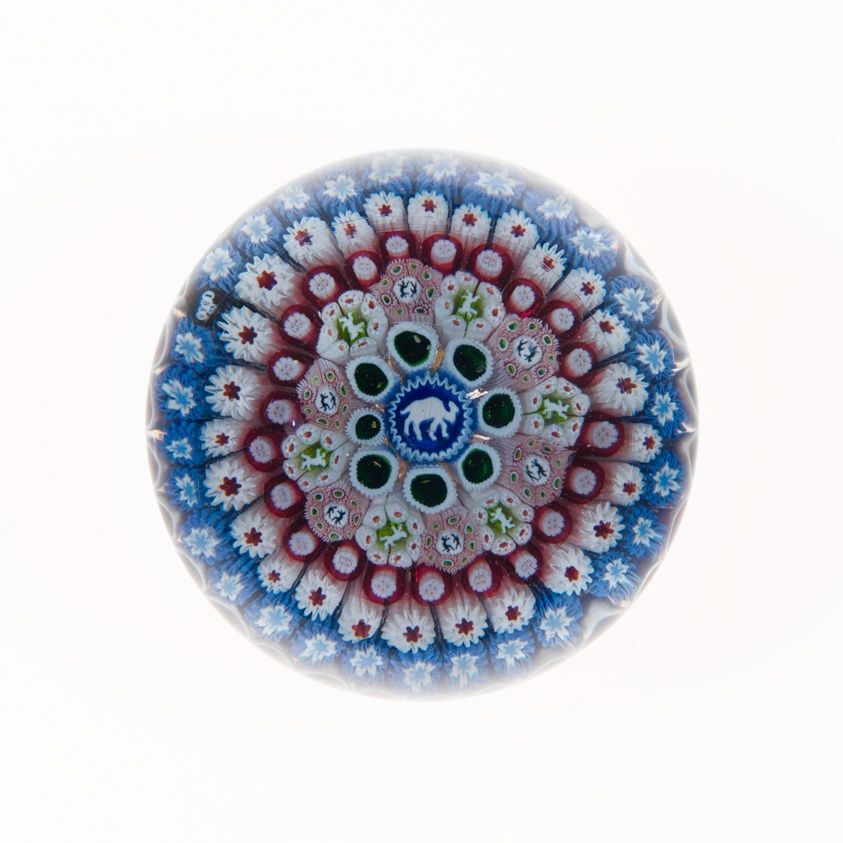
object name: Glass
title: Paperweight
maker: Saint-Louis Glassworks (Cristalleries de Saint-Louis); Lorraine, France, founded 1586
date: 1848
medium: Glass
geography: Saint-Louis-lès-Bitche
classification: paperweight; glass; european decorative arts